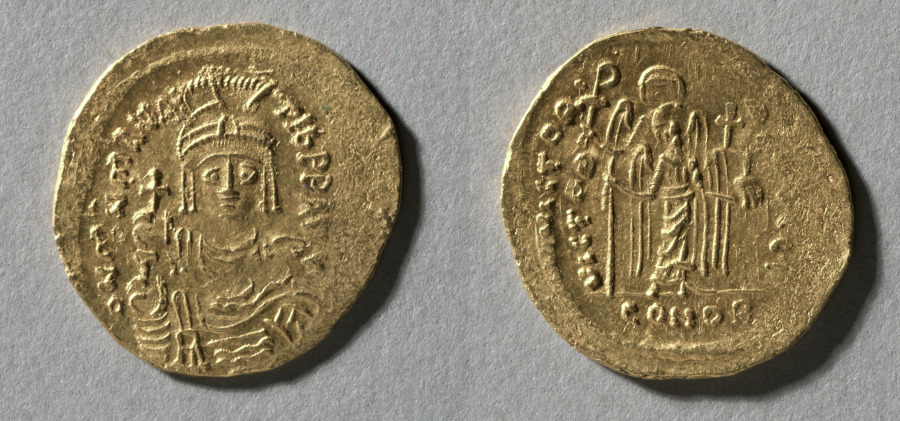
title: Solidus of Maurice Tiberius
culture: Byzantine, 6th-7th century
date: 583–602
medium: gold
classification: Coins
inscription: (Avers): DN MAVRC TIbPPAV[C] (Revers): VICTOR[I] AAVC[CI] and CONO[B]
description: This coin was minted by Maurice Tiberius, an emperor best known for his military prowess and his successes in the war against the Persians.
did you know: The solidus coin was first made in AD 301 in Rome.